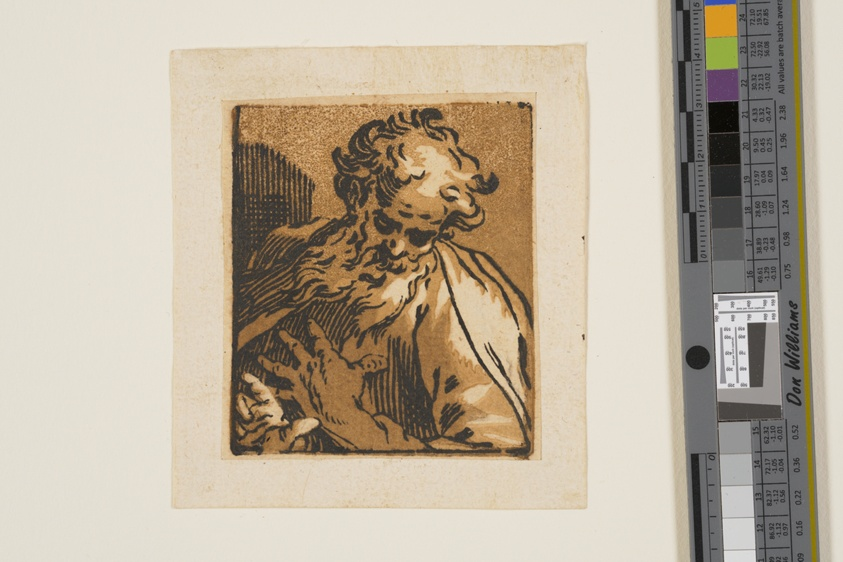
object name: Print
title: St Jerome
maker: Attributed to Ludolph Büsinck (German, c. 1590-after 1643); after Abraham Bloemaert (Dutch, 1566–1651)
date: c. 1620-23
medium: Chiaroscuro woodcut from three block on ivory laid paper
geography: Netherlands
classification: print; paper; prints and drawing; chiaroscuro woodcut